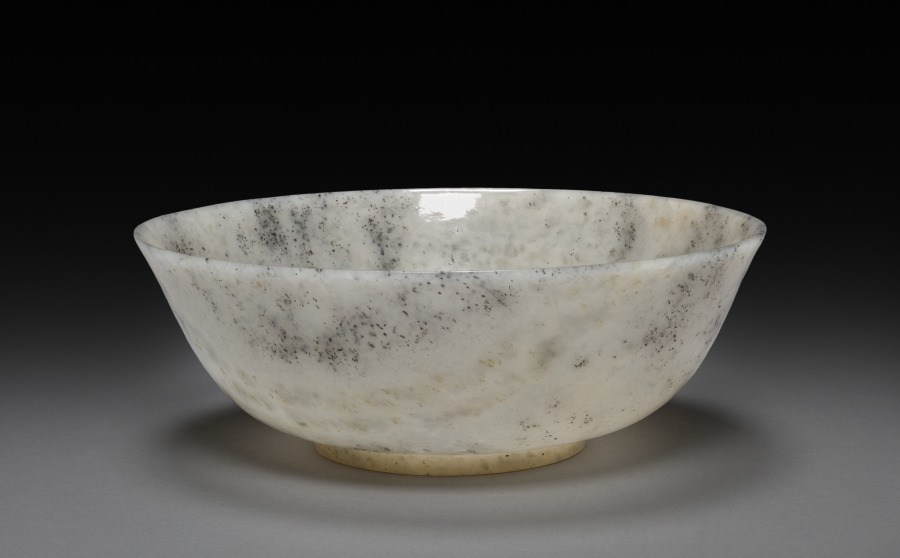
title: Bowl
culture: China, Qing dynasty (1644-1911), Qianlong mark and reign (1736-95)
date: 1736–95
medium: jade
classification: Jade